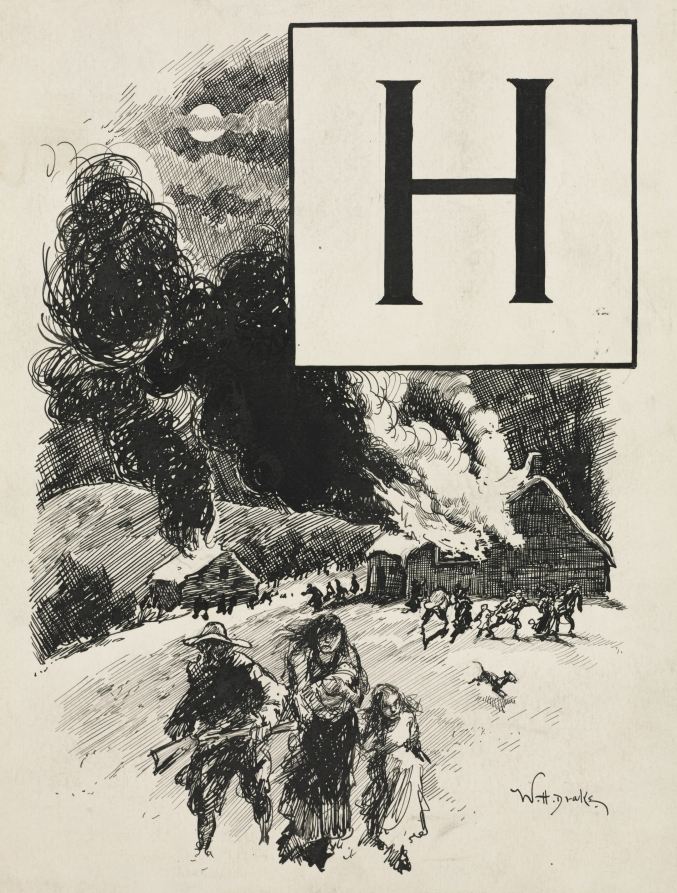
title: Inital H for Chapter LXXI from "Lorna Doone"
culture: America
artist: William Henry Drake (American, 1856–1926)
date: c. 1899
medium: pen and ink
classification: Drawing